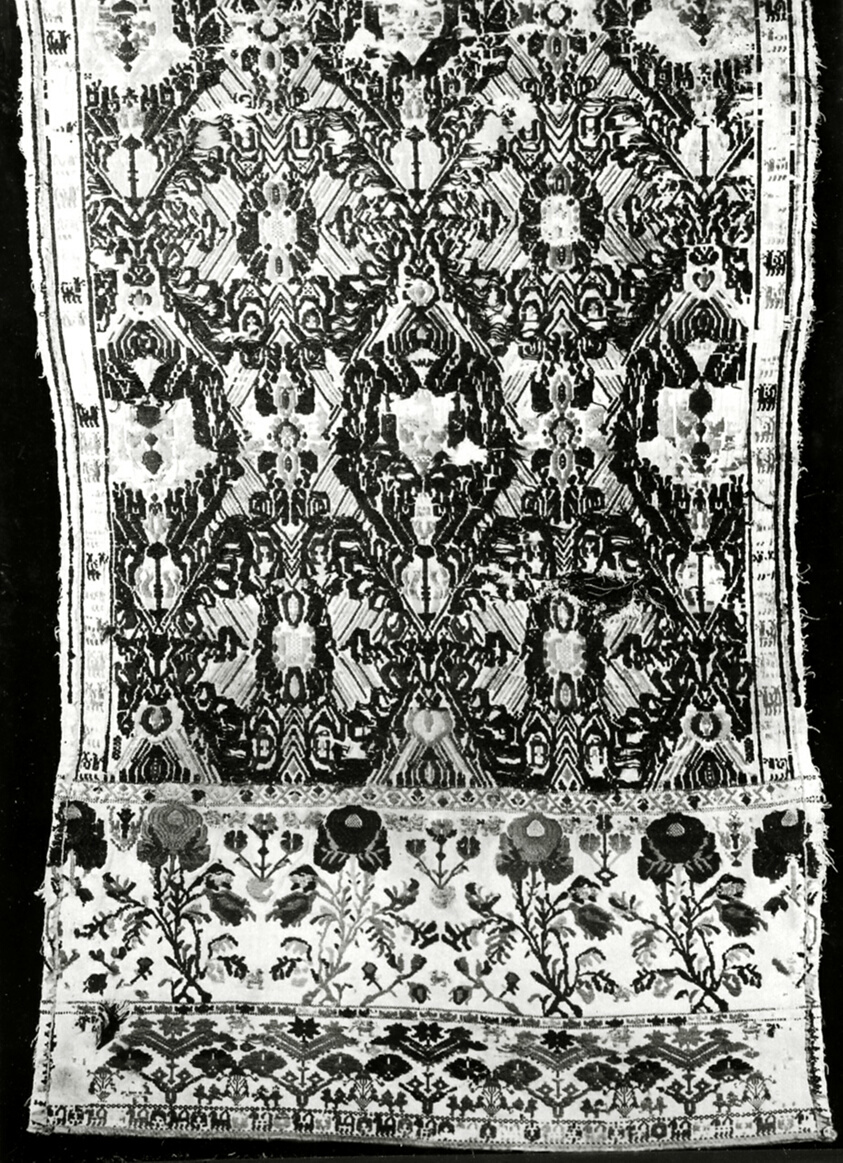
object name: Textile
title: Panel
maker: Sardinia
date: 19th century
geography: Sardinia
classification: textile; weaving